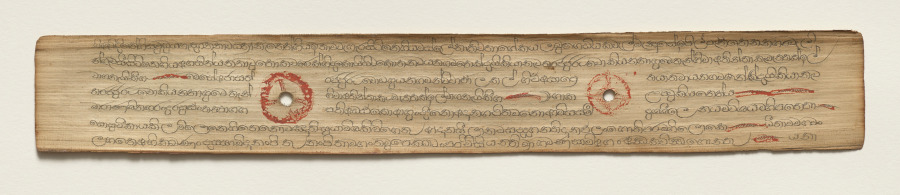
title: Leaf from a Buddhist Manuscript (verso)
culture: Sri Lanka, Singhalese, Late 17th century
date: c. 1700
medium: fiber paper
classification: Manuscript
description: Palm leaf material is still used for manuscripts in Sri Lanka. The palm leaves are prepared first by boiling them, drying them in the sun, and then rubbing them with oils. Scribes then use a metal stylus to incise the text. Then charcoal powder is wiped across the pages, filling in only the inscribed lines.